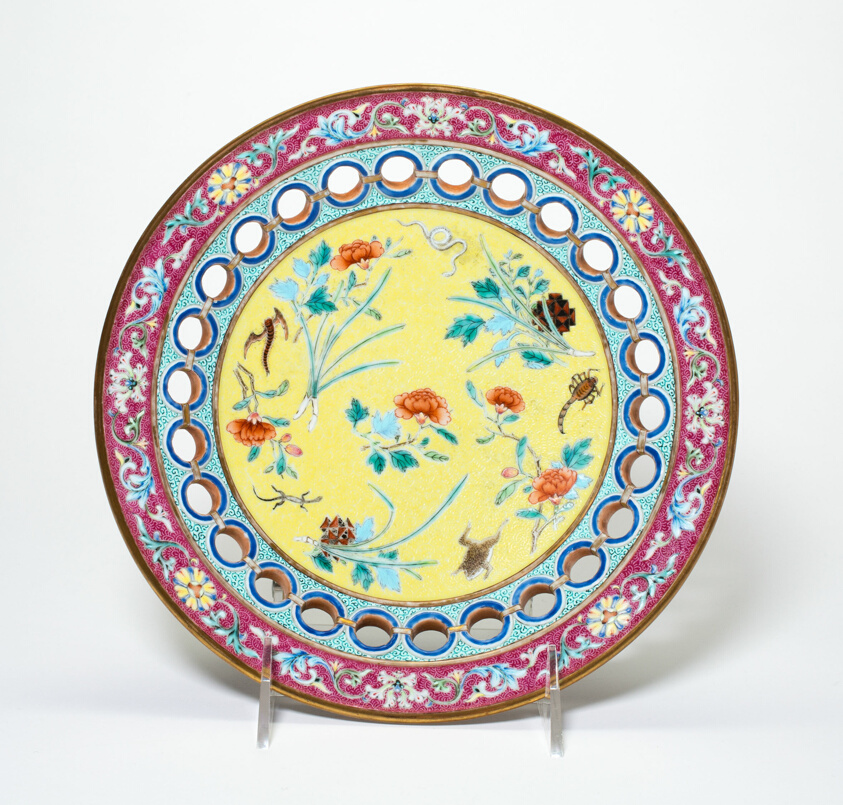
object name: Vessel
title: Plate with Talismans for Duanwujie (Dragon Boat Festival)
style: Chinese (culture or style)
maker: China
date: Qing dynasty (1644–1911), Qianlong reign mark and period (1736–1795)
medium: Porcelain painted in overglaze enamels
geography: China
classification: plate (general, dish); porcelain; dish (vessel); asian art; ceramics; vessel